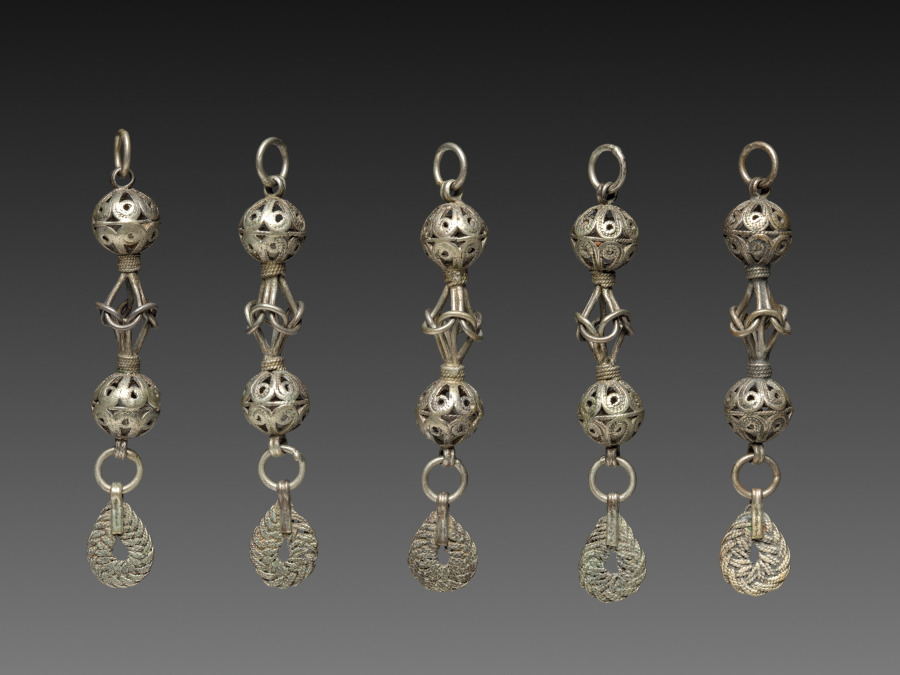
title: Set of Buttons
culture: Balkans, 19th century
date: 1800s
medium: silver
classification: Jewelry